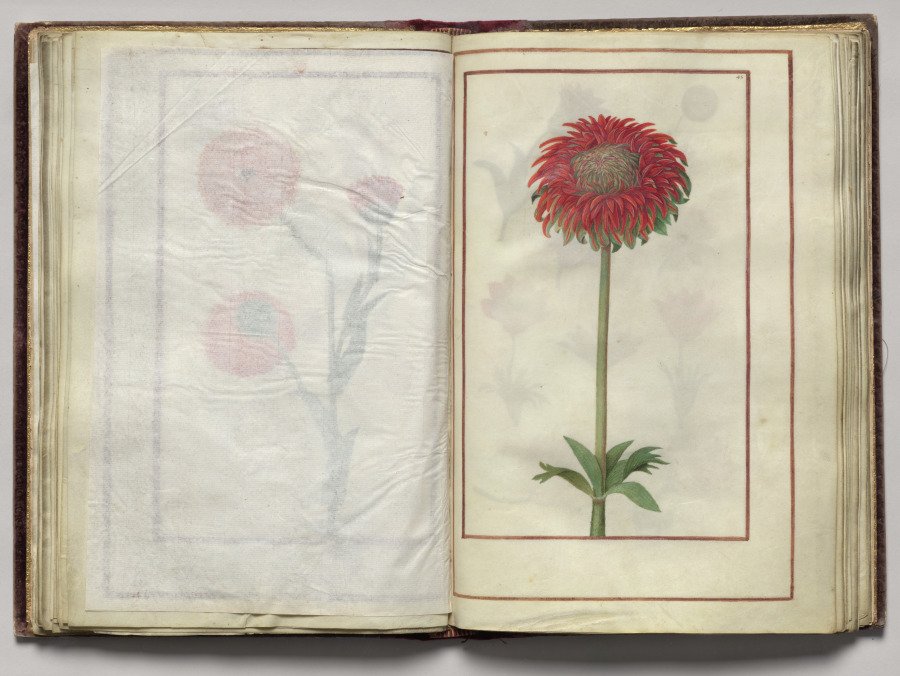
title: Dahlia?, folio 23 (recto), from Florilegium (A Book of Flower Studies)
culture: France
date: 1608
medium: watercolor, ink, silver, and gold over occasional traces of pencil, on vellum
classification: Bound Volume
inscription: Dated: Poitiers 1608 (on frontispiece) Signed: On frontispiece in black ink, lower right: Van Kuyk Notation on drawing: Frontispiece: in pencil, lower margin: * élève de Van Kessel, peintre flammand (* in pencil also appears in front of Van Kuyk's name).